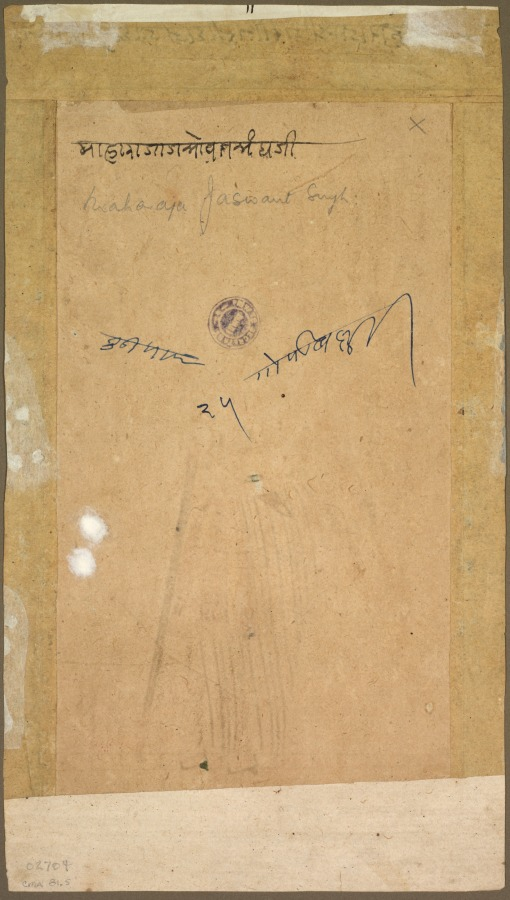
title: Jaswant Singh of Jodhpur (reigned 1635–1678)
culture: Northwestern India, Rajasthan, Rajput kingdom of Jodhpur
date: c. 1660–65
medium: Gum temper and gold on paper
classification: Painting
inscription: verso, upper center: Maharaja Shri Jasot Singh-ji Jodhpur-ka Raja.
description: Mughal emperors forged alliances with the Hindu rulers of territories under their control by offering them positions of military authority within the Mughal court. Jaswant Singh, the raja (ruler) of Jodhpur, served as a military officer under the emperors Shah Jahan (reigned 1627–58) and Alamgir (also known as Aurangzeb; reigned 1658–1707). The flowering plants at the end of his sash became popular during the reign of Shah Jahan. His military accouterments include two swords and a stabbing dagger. The sensitive shading and mode of dress are closely based on Mughal styles, indicating Jodhpur’s close allegiance to the Mughal empire.